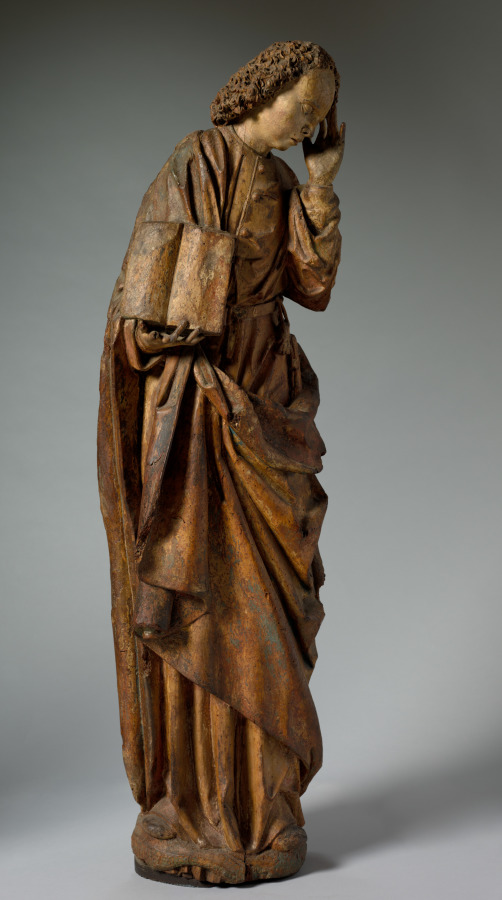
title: Saint John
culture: France, 15th century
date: 1450–1499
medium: wood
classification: Sculpture